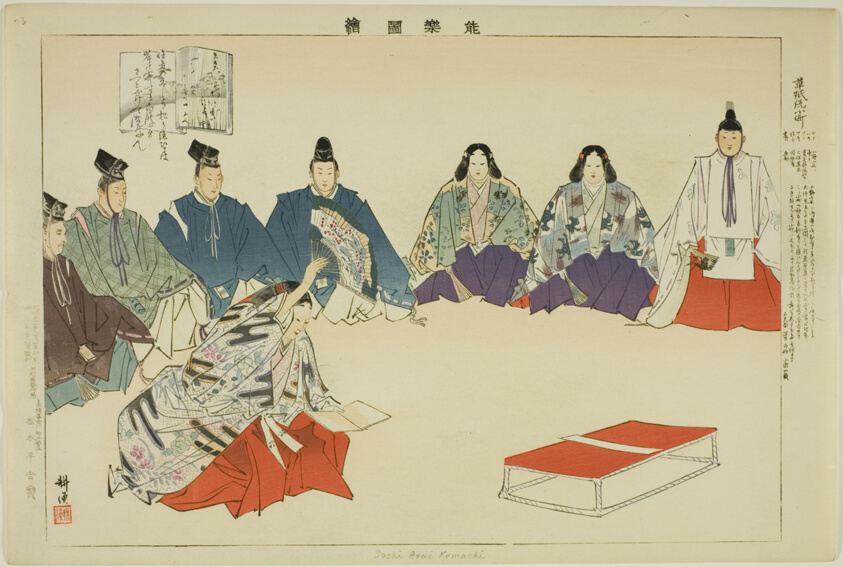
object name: Print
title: Soshi-arai Komachi, from the series "Pictures of No Performances (Nogaku Zue)"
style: Japanese (culture or style)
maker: Tsukioka Kogyo; Japanese, 1869-1927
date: 1898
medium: Color woodblock print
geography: Japan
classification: woodblock print; print; asian art